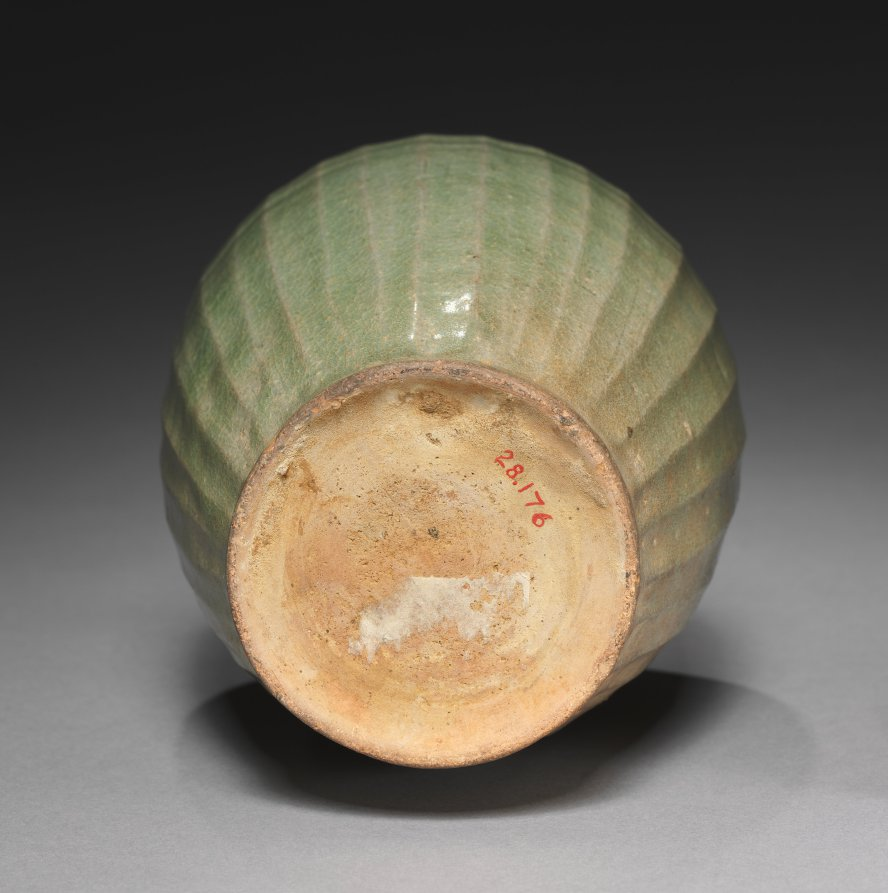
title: Wide-Mouthed Vase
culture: Korea, Goryeo dynasty (918–1392)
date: 1000s–1100s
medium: porcelaneous ware with celadon glaze and fluted and incised decoration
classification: Ceramic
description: As early as the seventh century, the practice of drinking tea and wine became an important part of elite culture in Korea. Elites of the Goryeo period commissioned a variety of types of utensils and vessels including this handsome wine bottle, to make their drinking experience more exciting.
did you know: The translucent greenish and bluish glaze of Goryeo celadons, shown in this vase, is the result of distinctive small and long Korean kilns, which maintained a low oxygen saturation with a high level of carbon dioxide.